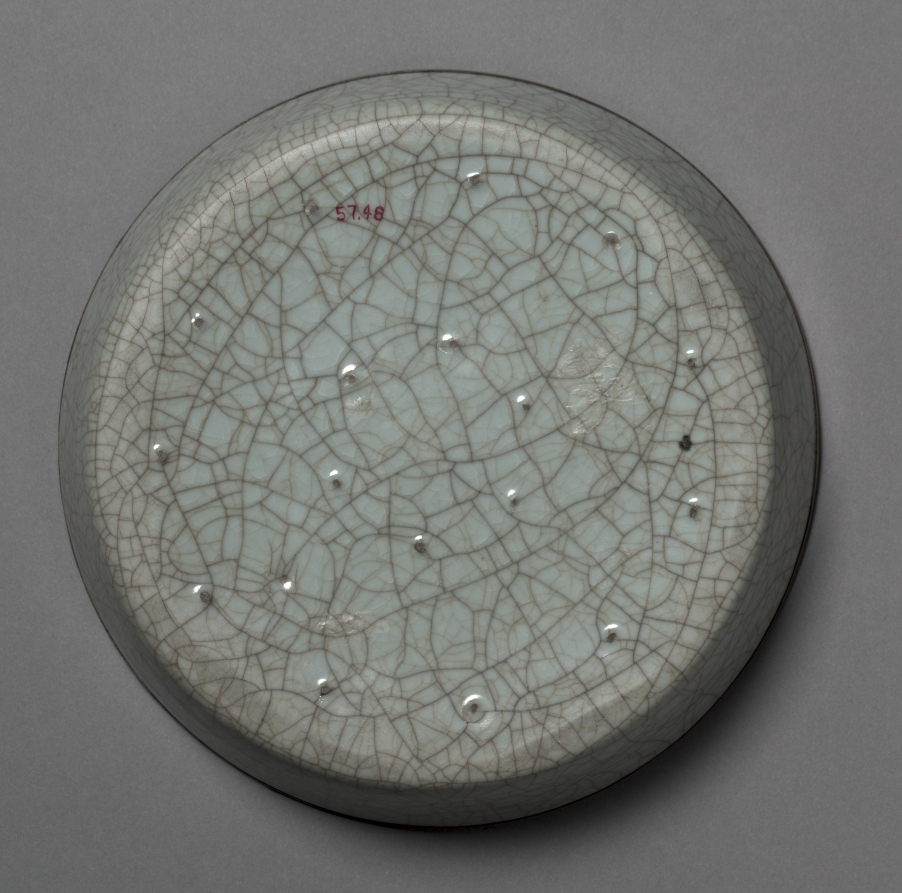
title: Basin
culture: China, Zhejiang province, Hangzhou, Southern Song dynasty (1127-1279)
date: 1127–1279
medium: porcelaneous stoneware, Guan ware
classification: Ceramic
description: Guan ware was the official ware fired at the Southern Song imperial kilns in Hangzhou. Multiple glazing is characteristic of this ware. The total thickness of the glaze can be greater than the clay body that supports it. Here, the thick gray-green glaze is webbed with a wide network of dark brown crackles as well as finer webs of light golden-brown and colorless crackles. The crackle pattern was developed after firing, due to the different rates of expansion and contraction of the body and the glaze. It was consciously exploited to achieve an aesthetic effect and was stained at different stages during the cooling process.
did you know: The base shows that the basin was fired on 17 small spurs arranged in two concentric circles.